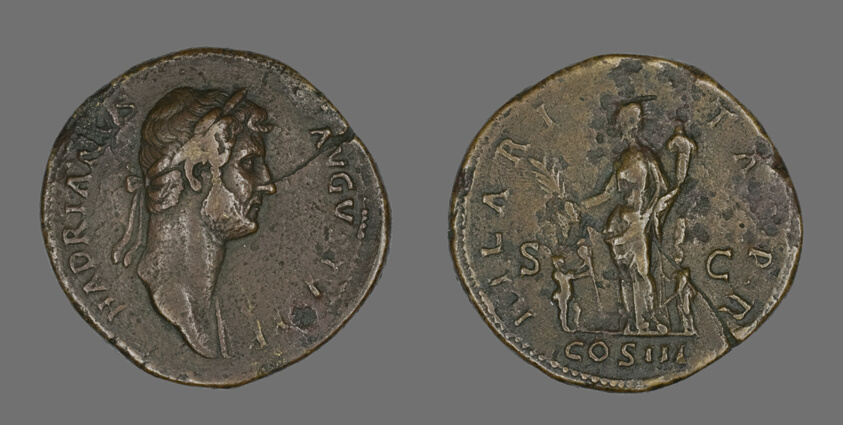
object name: Coin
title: Sestertius (Coin) Portraying Emperor Hadrian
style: roman (ancient, style or period)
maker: Roman, minted in Rome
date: 128-132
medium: Bronze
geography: Roman Empire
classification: coin; ancient art